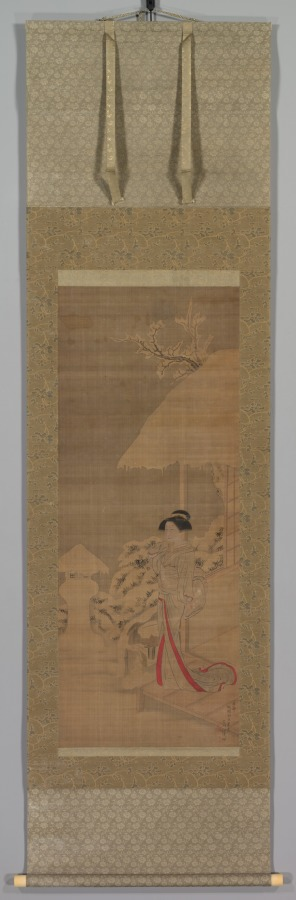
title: Beauty (Bijin) in the Snow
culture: Japan, Edo period (1615–1868)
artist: Shiba Kōkan (Japanese, 1747–1818)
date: c. 1775–1818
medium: hanging scroll; ink and color on silk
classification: Painting